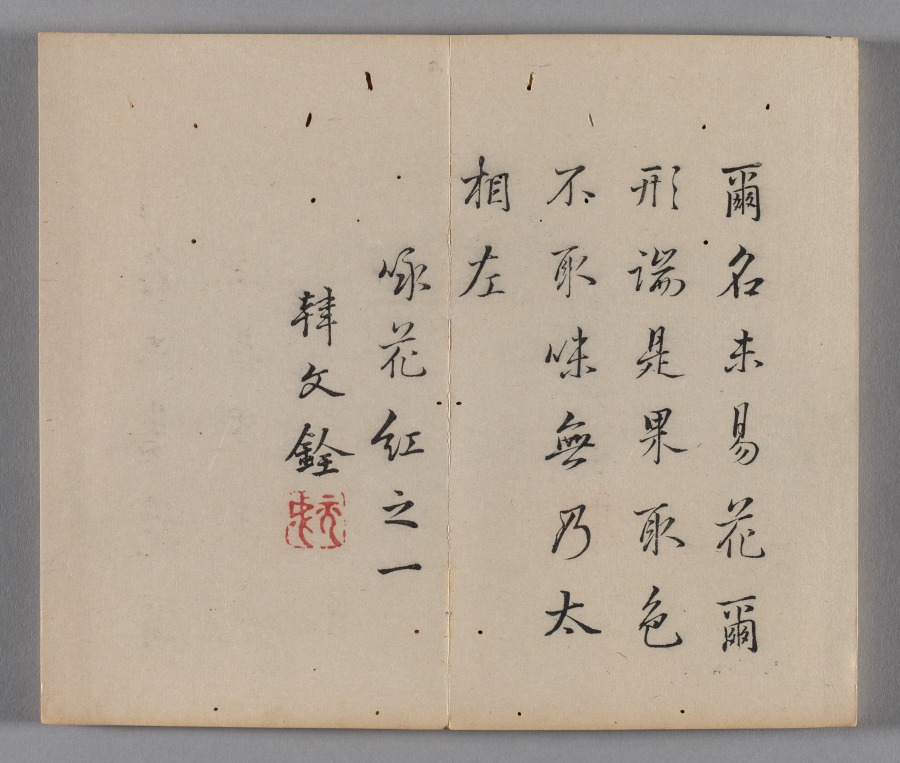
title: Ten Bamboo Studio Painting and Calligraphy Handbook (Shizhuzhai shuhua pu): Fruit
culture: China, Qing dynasty (1644-1911)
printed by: Hu Zhengyan (Chinese, c. 1584–1674)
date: 1633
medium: Woodblock-printed book; ink and colors on paper; first edition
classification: Print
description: Color printing reached a level of perfection in the early 1600s, as seen in this Ten Bamboo Studio Collection of Calligraphy and Painting and the Mustard Seed Garden Manual of Painting (printed 1679 and 1701). The painterly quality, precision in registering (aligning) the woodblocks, and harmonious colors made them the most successful color print editions in Chinese history. Both editions were printed and compiled in Nanjing, spread nationwide, and had a great impact on the arts in Japan and Korea.